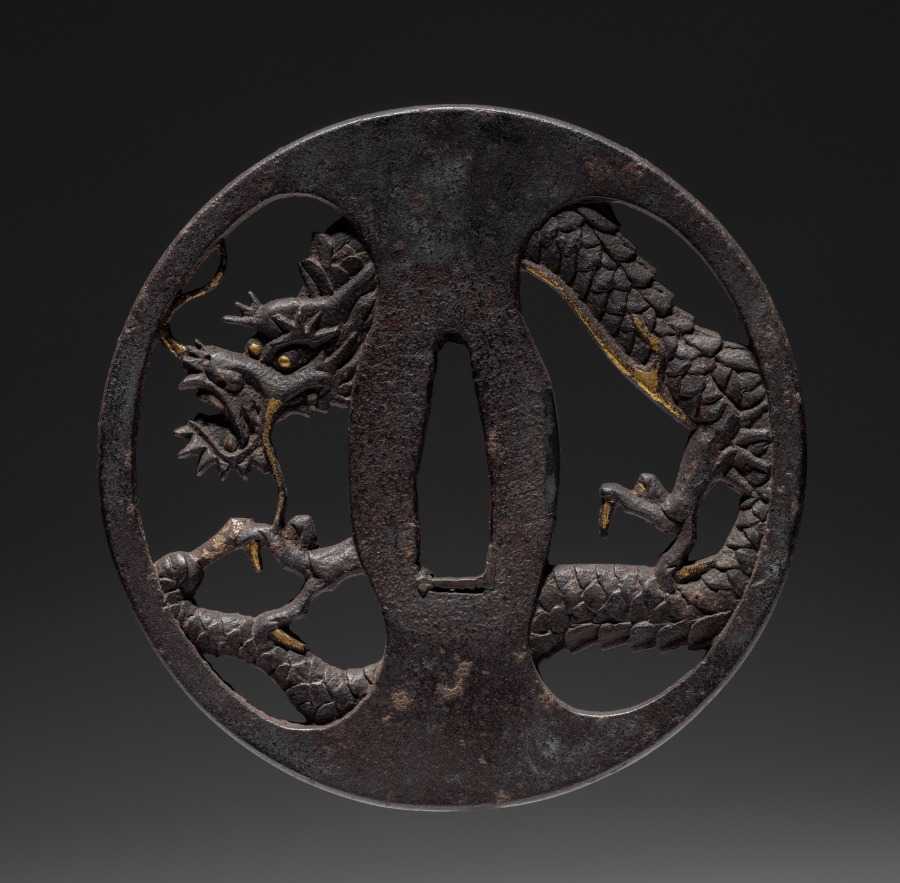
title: Sword Guard (Tsuba) with Dragon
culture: Japan, possibly Edo period (1615-1868)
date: c. 1615–1868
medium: iron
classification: Arms and Armor